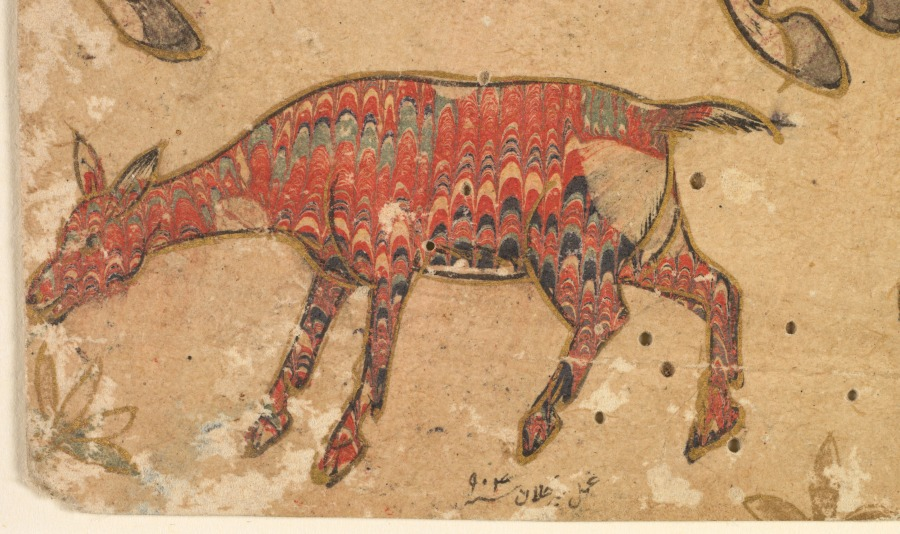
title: A marbled picture of Rustam catching Rakhsh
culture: India, Bijapur, Deccan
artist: attributed to Shafi (Indian, active about 1650)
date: c. 1650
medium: Gum tempera and gold on paper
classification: Painting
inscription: apocryphal inscription lower left: 'amal-i mir Kalan 904 verso: inscription identifying the scene of Rustam capturing Rakhsh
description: This scene depicts the young hero Rustam catching a foal, Rakhsh (meaning “light”), who will be his faithful companion through many adventures. A prophet-like shepherd figure with a staff at the upper left predicts that Rustam will be the savior of Iran. At the top of the page a feline has caught its prey, while a hunter steps on its tail. This extraordinary painting has more applications of marbled colorant than any other known example. Even all the flowers and birds have been articulated through marbling in a feat of registration and control by a master of the technique.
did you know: Even the flowers and insects used as filler in this composition were marbled.